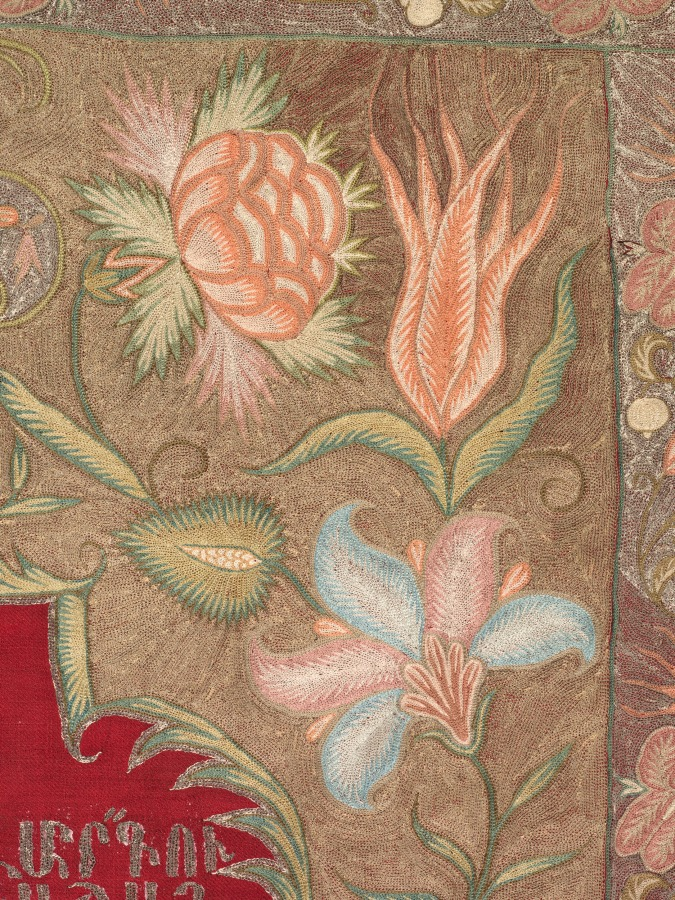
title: Embroidered Armenian liturgical curtain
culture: Turkey, Constantinople/Istanbul, Ottoman period (1299–1922)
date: 1763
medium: twill weave: wool; embroidery, chain stitch: silk, gilt- and silver-metal thread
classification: Textile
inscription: Inscription embroidered in erkatagir script with metal thread reads: "This curtain (varakouyr) is in memory of the people of Hassan Pasha Khan who gave it to the Monastery (vank) of Saint John the Baptist (Surp Garabed) on the Armenian date 10 May 1212 (1763 AD)."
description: This rare Ottoman embroidery features a floral bouquet that enriches the field under an elegant arch of gilt-metal thread. Flanked by vines of tulips and irises on a silver-metal-thread ground, vases of tulips and jonquils within cartouches adorn the main border and the well-turned corners, a sign of high quality. Dated 1763, the textile documents a mid-18th-century style and technique uncommon in Ottoman embroideries. The Armenian community commissioned this pattern for a liturgical curtain. Beneath the arch, Saint John the Baptist appears with a staff of victory, holding his own severed head in one arm and the Lamb of God in the other. The embroidered Armenian inscription reads: "This curtain is in memory of the people of Hassan Pasha Khan who gave it to the Monastery of Saint John the Baptist on the Armenian date 10 May 1212 [1763]."